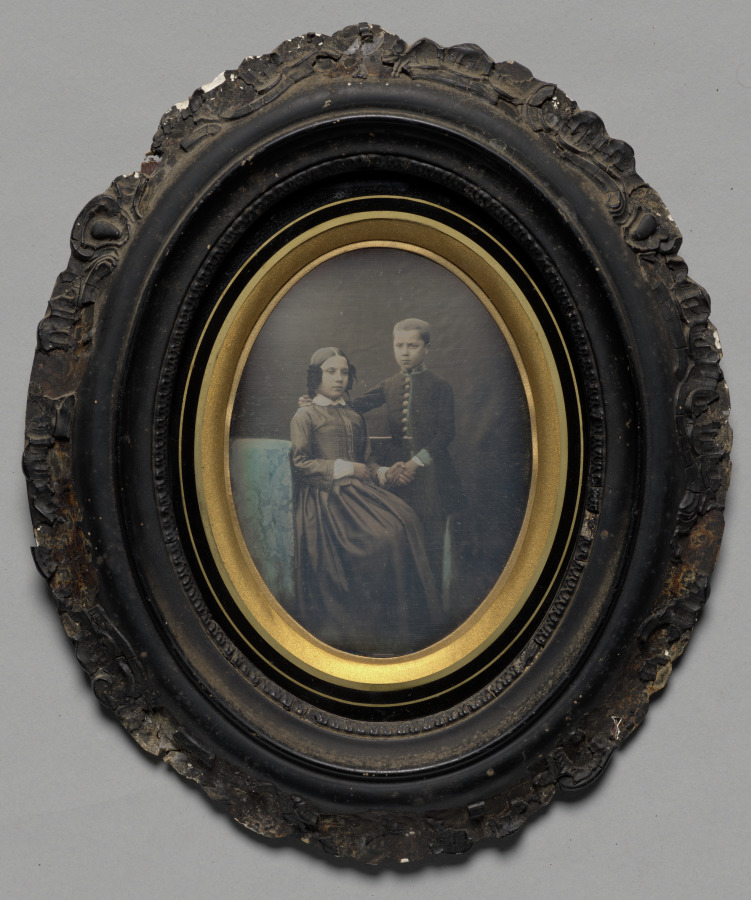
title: Brother and sister clasping hands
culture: France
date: c. 1860–65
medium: daguerreotype, half-plate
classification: Photograph